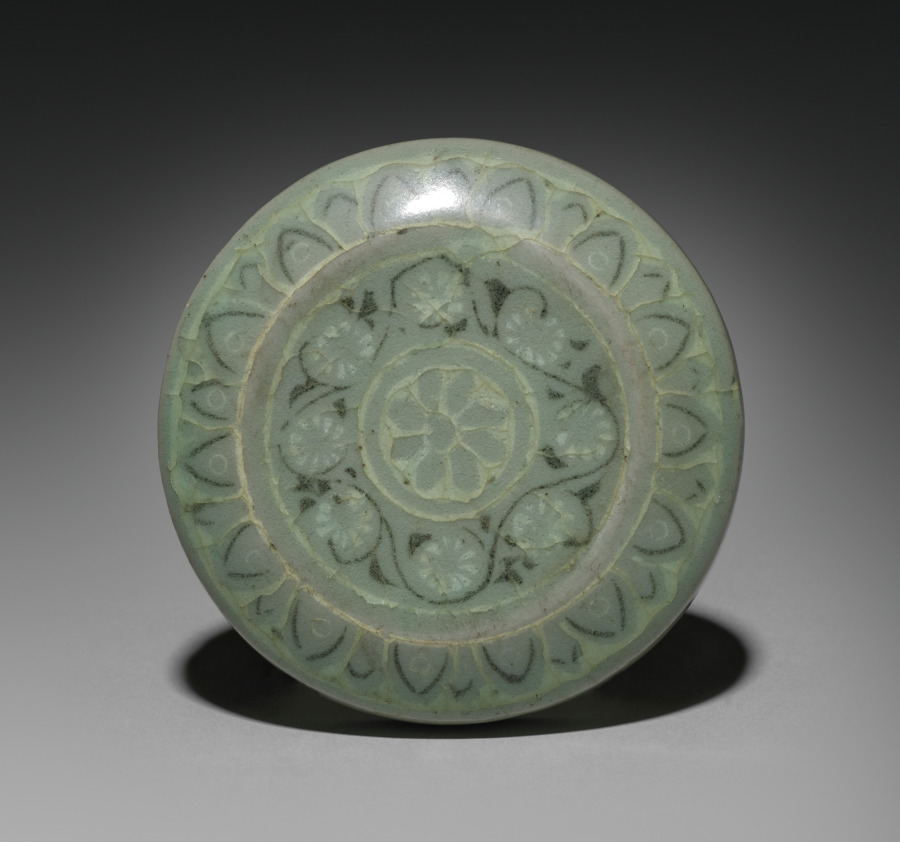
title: Box and Cover (lid)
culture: Korea, Goryeo dynasty (918–1392)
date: 918–1392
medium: celadon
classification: Ceramic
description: Celadons, spoons, seals, and bronze mirrors were the most common burial objects in tombs during the Goryeo period (918-1392). Once used to contain color powder, rouge and eyebrow gel for makeup, this small container was one of the standard goods that furnished elites' tombs. Goryeo-period women and men used the grain powder of rice or millet for whitening their skin, safflower extract for rouge, and plant ash or soot for eyebrow gel. Yet, natural-looking make-up seems to have been the most favorable one in Korea according to the travelogue by Xu Jing (1091-1153), the Chinese diplomat who visited Korea in 1123.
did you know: This ceramic container was used to store incense or cosmetics.